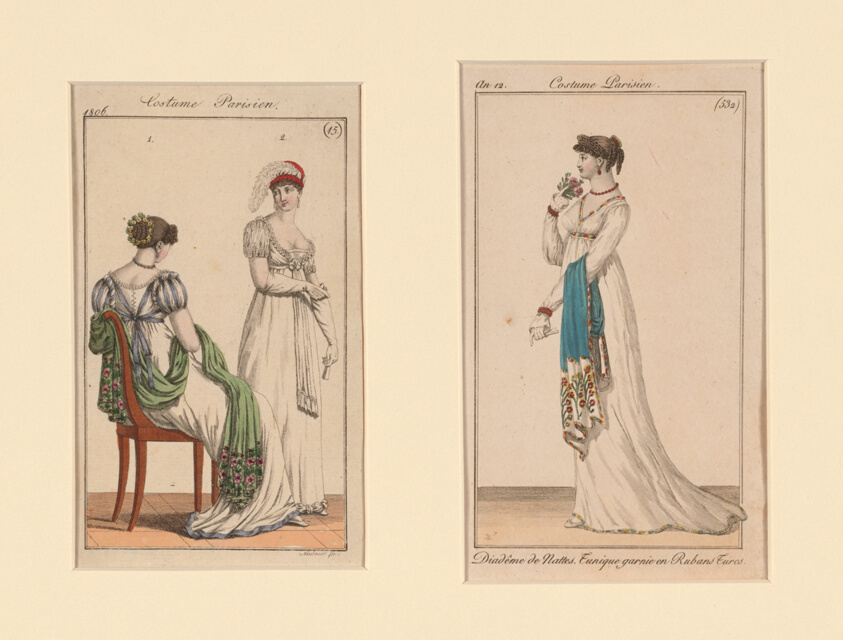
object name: Print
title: "Costume Parisien" Fashion Plates from Journal des Dames et Des Modes and Costume Parisien (The Journal of Ladies and Fashion)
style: 19th century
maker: Paris, France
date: 1804 and 1806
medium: .1 Etching and engraving in black ink with watercolor on cream laid paper .2 Etching and engraving in black ink with watercolor and touches of metallic watercolor on cream wove paper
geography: Paris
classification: fashion plate; accessory - paper design; textile; garment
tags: fashion, ribbon, dresses, woman, garment